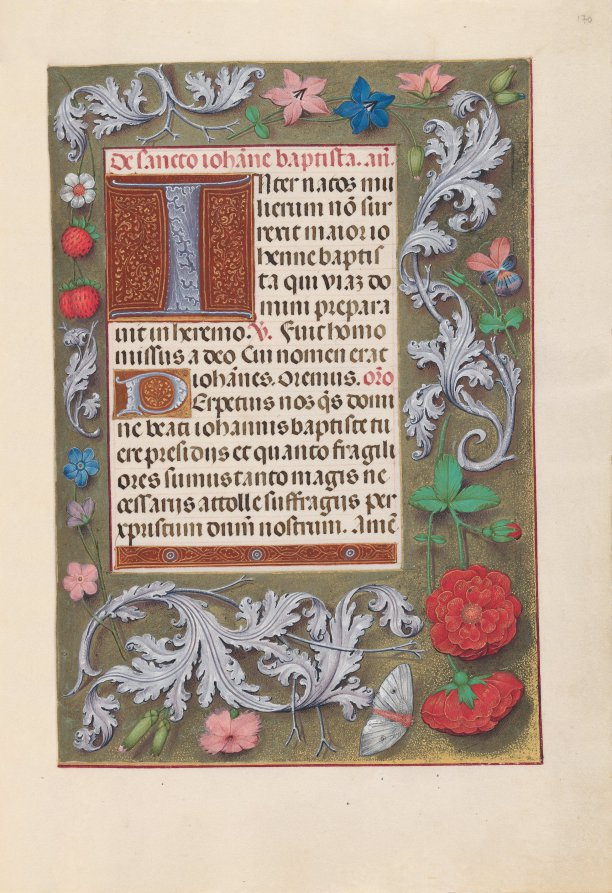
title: Hours of Queen Isabella the Catholic, Queen of Spain: Fol. 170r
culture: Flanders, Ghent and Bruges, late 15th century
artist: Master of the First Prayerbook of Maximillian (Flemish, c. 1444–1519)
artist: and Associates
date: c. 1500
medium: ink, tempera, and gold on vellum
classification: Bound Volume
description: This manuscript was illuminated by a circle of at least five highly organized manuscript painters active in the Flemish cities of Ghent and Bruges. The principal illuminator was Alexander Bening, who painted the majority of the book's miniatures. Manuscripts produced by this circle of artists are renowned for the decoration of their borders, which typically feature a rich variety of realistically-painted flowers, birds, and butterflies. This prayer book, called a book of hours, was intended not for a cleric, but for the private devotions of a lay person-in this case, Isabella the Catholic, Queen of Spain (1451-1504). Isabella's coat of arms embellishes the book's frontispiece. It is unlikely that the book was commissioned by the Queen herself; rather, she probably received it as a diplomatic gift from someone courting her patronage, perhaps Cardinal Francisco Jimenez de Cisneros. A Franciscan friar, Jimenez was dependent upon Isabella for his advancement, first to the post of Queen's confessor in 1492, and then to Archbishop of Toledo in 1495.